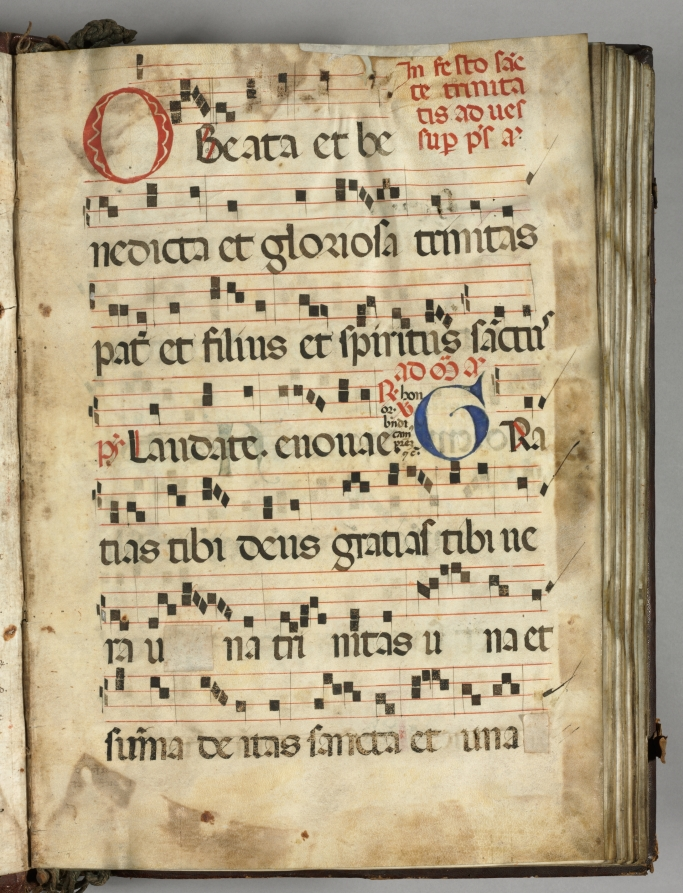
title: Choir Book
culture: Italy, 16th century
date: 1500s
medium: leather binding, copper alloy buckles, lead seal, parchment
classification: Manuscript